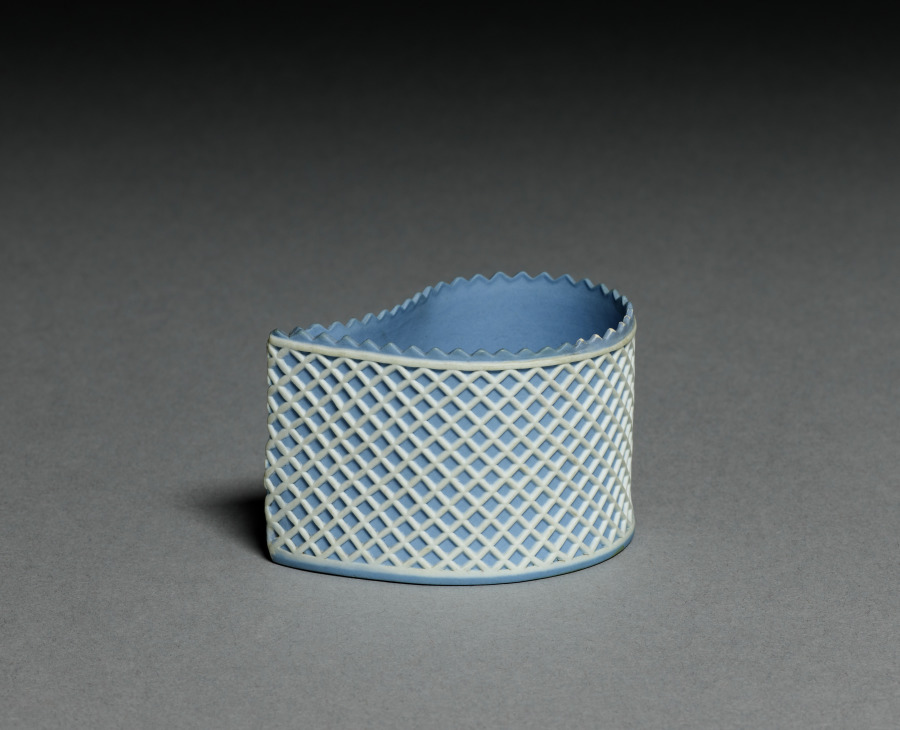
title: Custard Cup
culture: England, Staffordshire, 18th century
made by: Wedgwood Factory (British)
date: c. 1785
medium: jasper ware with relief decoration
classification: Ceramic